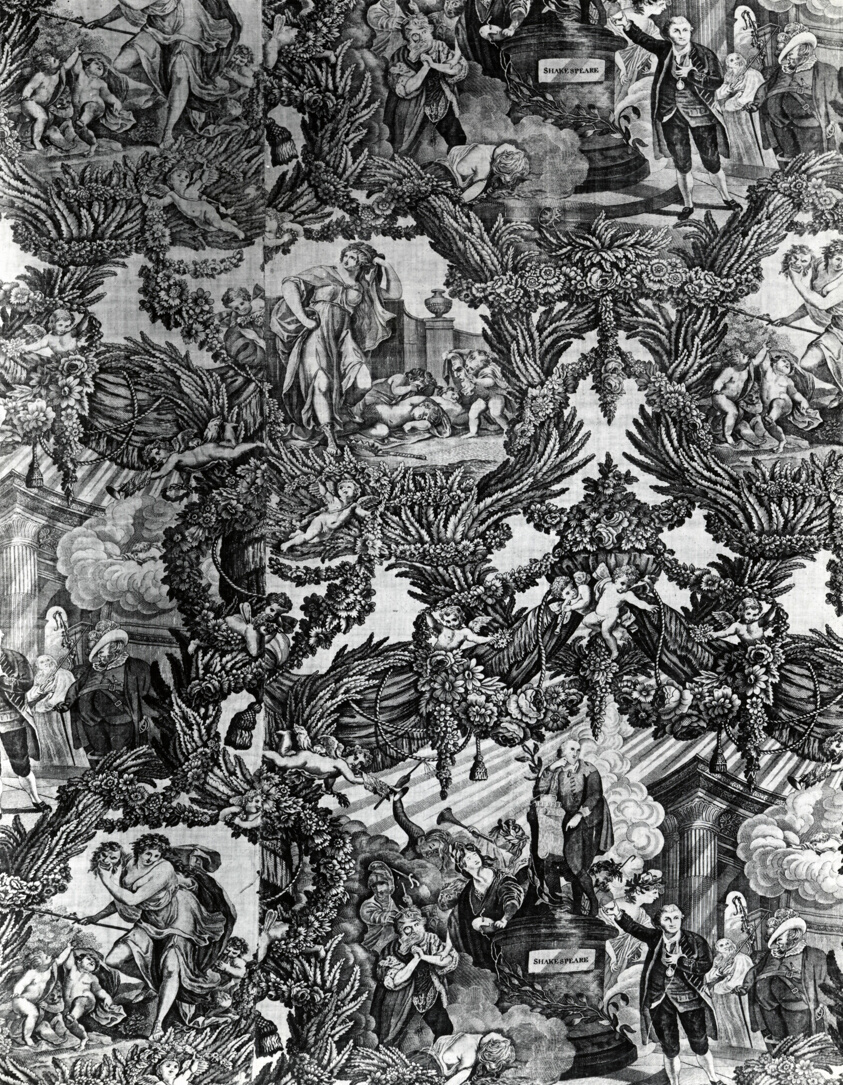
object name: Textile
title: Garrick and Shakespeare with Tragedy and Comedy (Furnishing Fabric)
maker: After a painting by Robert Edge Pine (English, c. 1730–1788) Engraved by Caroline Watson (English, 1760–1814); England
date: c. 1790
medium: Cotton, plain weave; engraved roller printed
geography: England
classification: textile; weaving - printed; furnishing textile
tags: propaganda